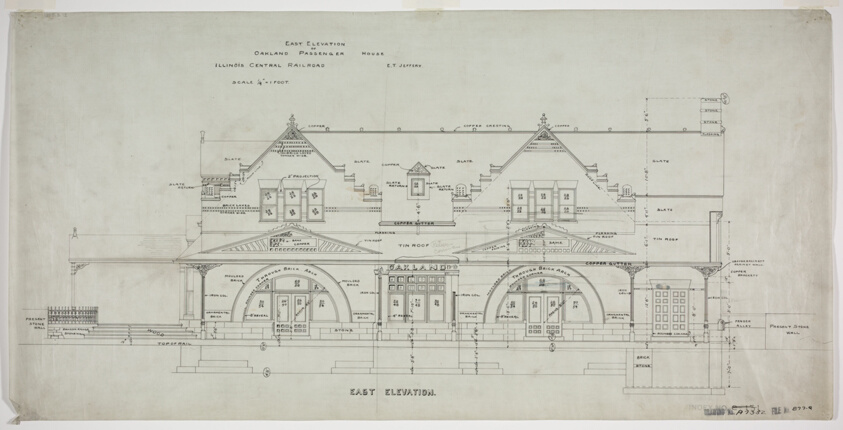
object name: Architectural Drawing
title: Oakland Avenue Railroad Station, Chicago, Illinois, East Elevation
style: 19th century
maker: Adler and Sullivan; American, 1883-1895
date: 1886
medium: Ink on linen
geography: Chicago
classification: architectural drawing; architecture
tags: train station, architecture, elevation, Chicago